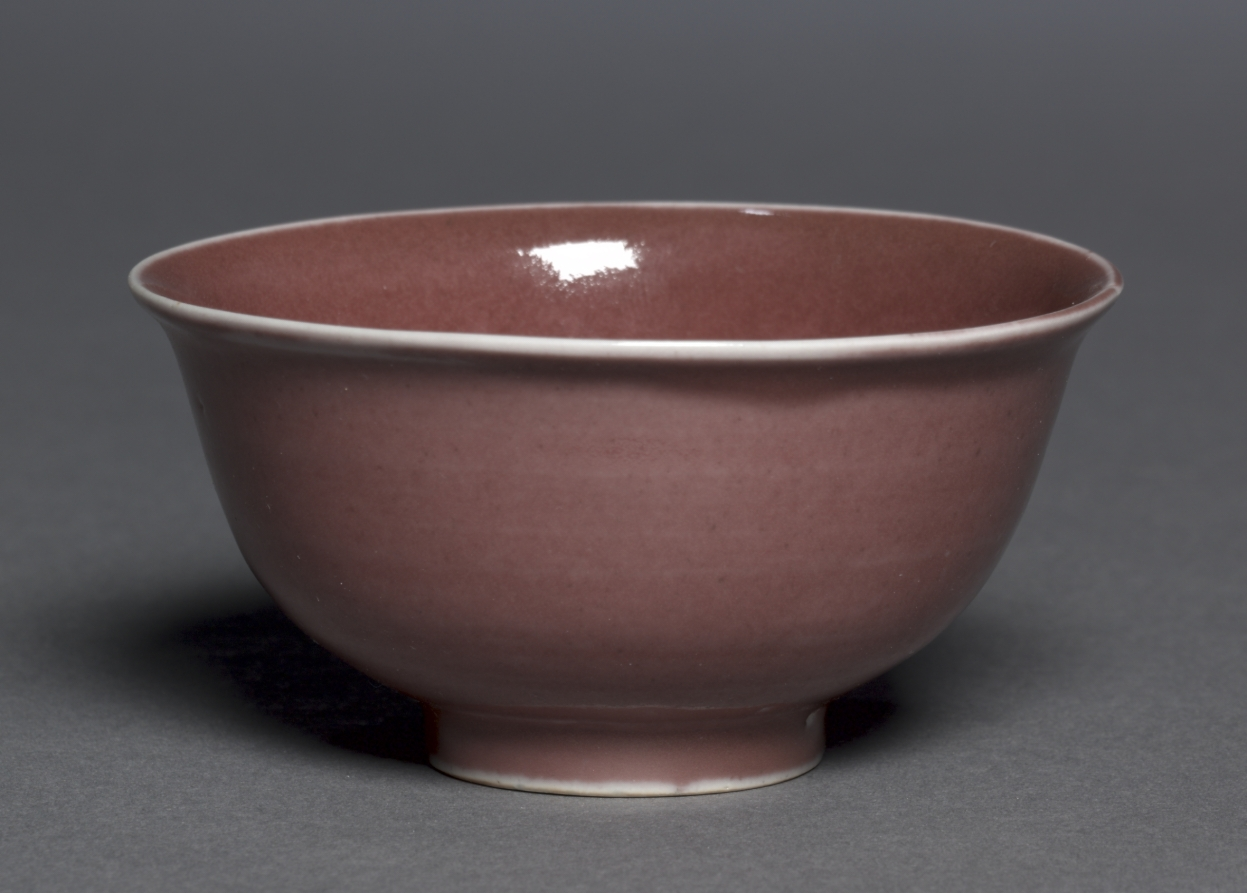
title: Bowl with Dragons and Clouds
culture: China, Jiangxi province, Jingdezhen, Ming dynasty (1368-1644), Hongwu period (1368-98)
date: 1368–98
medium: porcelain with molded and incised decoration and copper-red glaze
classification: Ceramic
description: Fragments of bowls with unglazed foot rings and molded and incised ornament very similar to this extremely rare piece have been excavated at the early Ming dynasty site of the Hongwu palace at Nanjing.